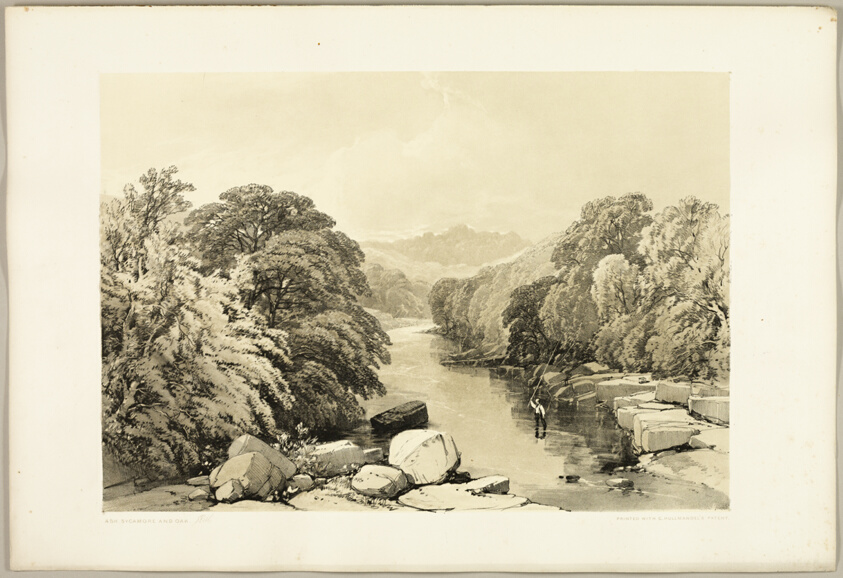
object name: Print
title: Ash, Sycamore and Oak, from The Park and the Forest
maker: James Duffield Harding (English, 1798-1863); printed by Charles Joseph Hullmandel (English, 1789–1850); published by Thomas McLean (English, 1788–1875)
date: 1841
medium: Lithograph in black, with brown tint from a second plate, on ivory wove paper, laid down on ivory wove paper (chine collé)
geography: England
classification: lithograph; print; prints and drawing